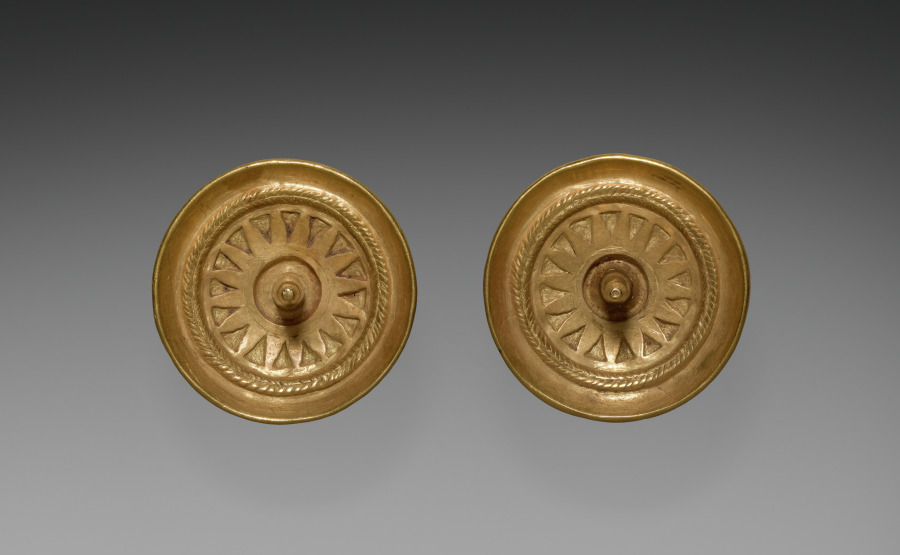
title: Ear Spool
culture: Panama, Conte style, 5th - 10th century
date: c. 400–900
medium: hammered gold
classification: Metalwork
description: Harvard archaeologists excavated the eight ornaments in this case from several burials at Sitio Conte, a cemetery famous for its lavish graves of powerful chieftains. The young man buried in Grave 26 was such a chief. His status was stunningly memorialized by 21 human companions and 475 objects, many of them personal ornaments made of gold, including the large chest plaque (no. 2) and the rod-shaped ear ornament (no. 3) shown here. The creature on the chest plaque, found close to the chief’s body, has reptile claws and perhaps the head crest of an iguana. Its meaning is unknown but perhaps, as in later periods, reptilian imagery and the warm gleam of gold linked rulers with the sun’s creative force.